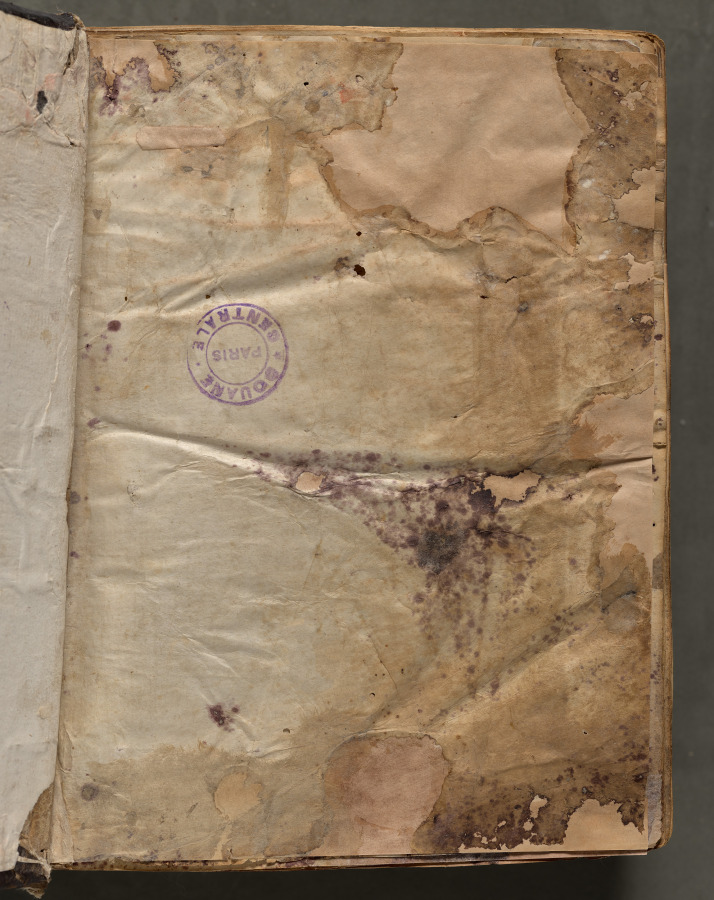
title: Text, folio 2 (recto), from a Gospel Book with Commentaries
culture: Byzantium, Constantinople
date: c. 1000–1100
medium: ink, tempera, and gold on vellum; leather binding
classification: Bound Volume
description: Each of the four gospels in this book opens on a page with brilliantly illuminated borders depicting the author of the text as well as birds-principally peacocks, symbols of the immortality of the soul-and fountains, representing the fountain of life and the salvation of the soul. This volume consists of 428 leaves with texts in Greek. Its level of sophistication suggests that it was probably written and decorated in a monastery in Constantinople.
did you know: Gospel Books were carried in procession through Byzantine churches.